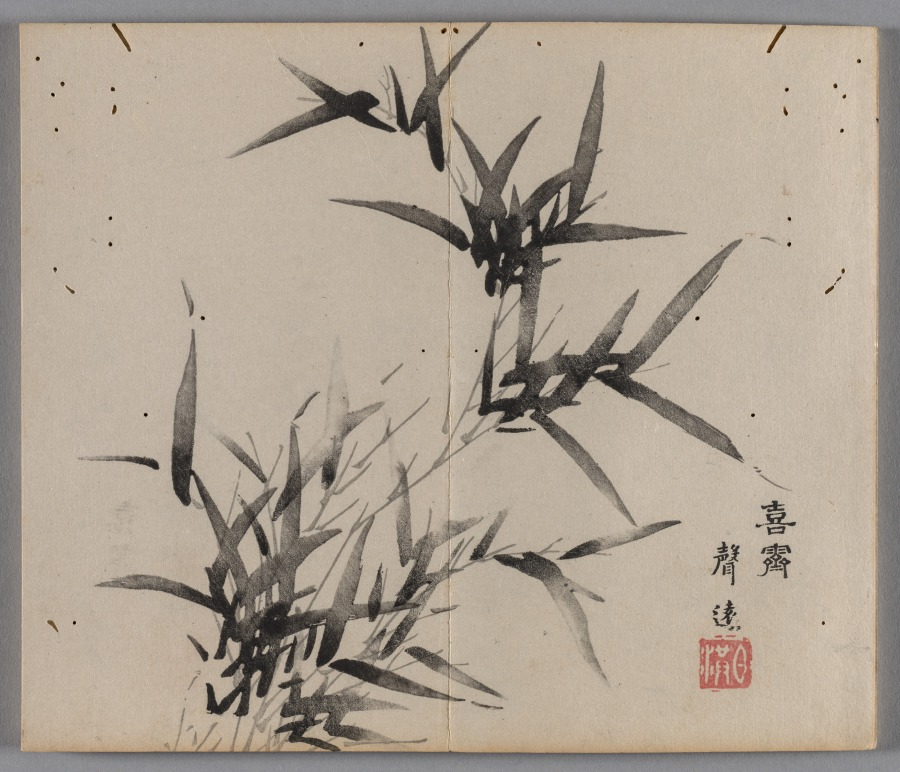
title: Ten Bamboo Studio Painting and Calligraphy Handbook (Shizhuzhai shuhua pu): Bamboo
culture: China, Qing dynasty (1644-1911)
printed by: Hu Zhengyan (Chinese, c. 1584–1674)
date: 1633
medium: Woodblock-printed book; ink and colors on paper; first edition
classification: Print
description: Color printing reached a level of perfection in the early 1600s, as seen in this Ten Bamboo Studio Collection of Calligraphy and Painting and the Mustard Seed Garden Manual of Painting (printed 1679 and 1701). The painterly quality, precision in registering (aligning) the woodblocks, and harmonious colors made them the most successful color print editions in Chinese history. Both editions were printed and compiled in Nanjing, spread nationwide, and had a great impact on the arts in Japan and Korea.